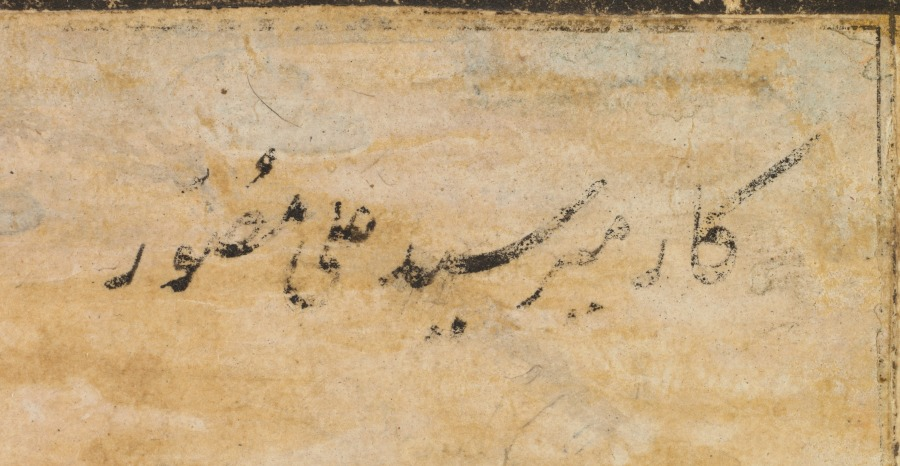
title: Hunting with falcons in a landscape (recto)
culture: Mughal India, court of Akbar (reigned 1556–1605)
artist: attributed to Abd al-Samad (Persian, c. 1510–1600)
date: c. 1558–60; borders added probably 1700s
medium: Gum tempera, ink, and gold on paper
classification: Painting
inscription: Inscription in upper right in nasta‘liq script, probably during the 1700s: the work of Mir Sayyid Ali, the illustrator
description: Mughal princes hunted on horseback with falcons. The hunting party would ride out into the wild and flush the prey from the brush. Then, its hood removed, the falcon would chase the prey and bring it down. This important work is thought to have been painted by one of the Persian artists Akbar’s father brought to India from Iran shortly after his arrival in India. The delicacy of the diminutive figures and the gently modeled rocks of the arid landscape contrast to the boldly dynamic paintings made by Indian artists.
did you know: The hunter’s glove is on the ground, as he pulls his falcon off the duck.